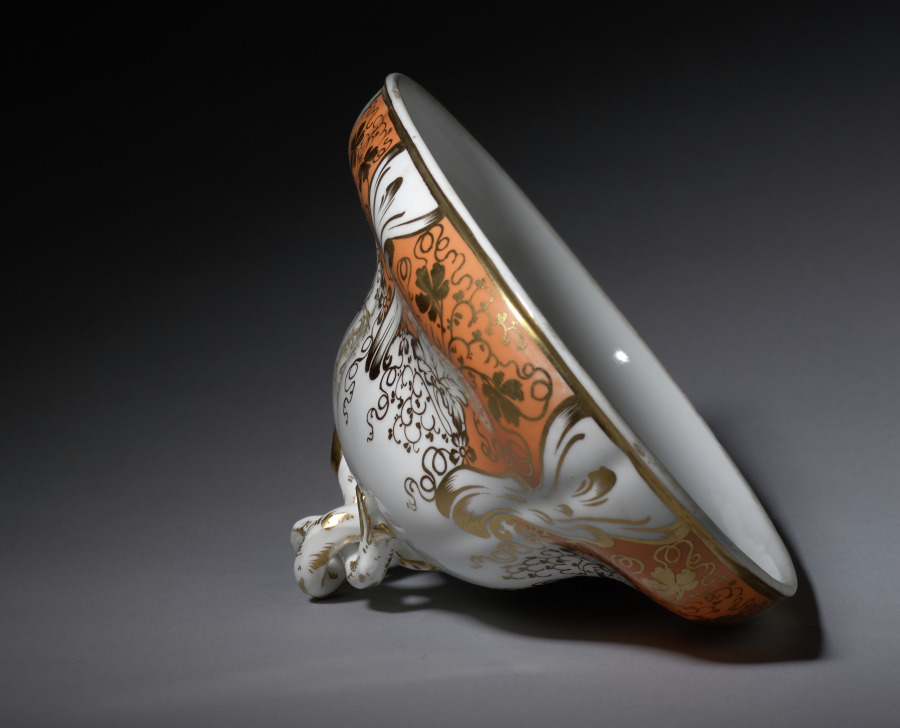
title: Vegetable Dish (lid)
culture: England, Staffordshire, early 19th century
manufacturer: Davenport Pottery and Porcelain Factory (British)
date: early 1800s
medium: ceramic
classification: Ceramic